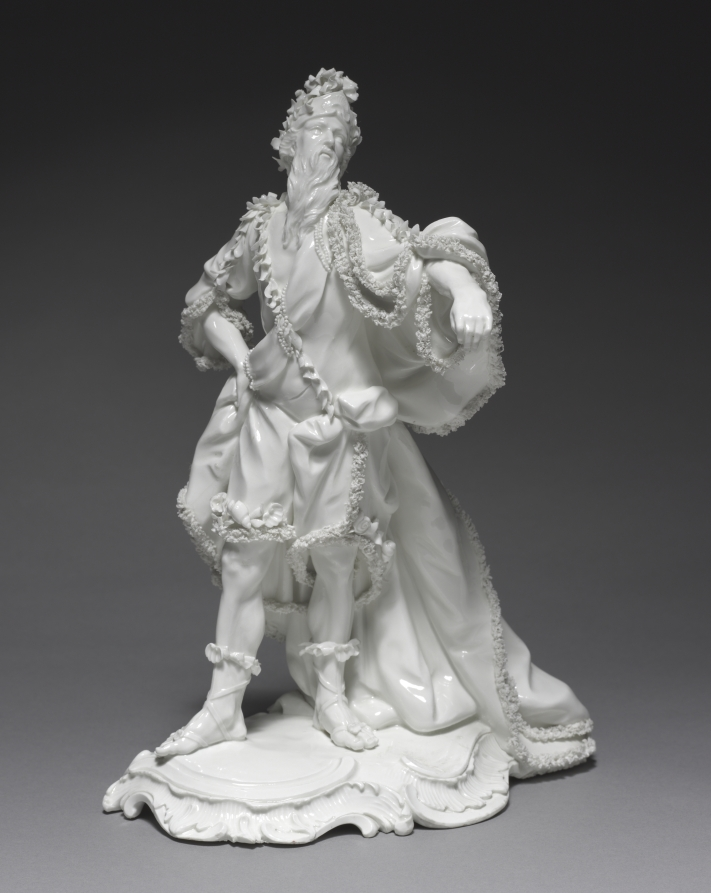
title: Oceanus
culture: Germany, Frankenthal, 18th century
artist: Frankenthal Porcelain Factory (German)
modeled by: Konrad Linck (German, 1732–1793)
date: c. 1765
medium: porcelain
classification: Ceramic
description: In Greek mythology, Oceanus was ruler of the sea before Poseidon. His counterpart in Roman mythology is Neptune